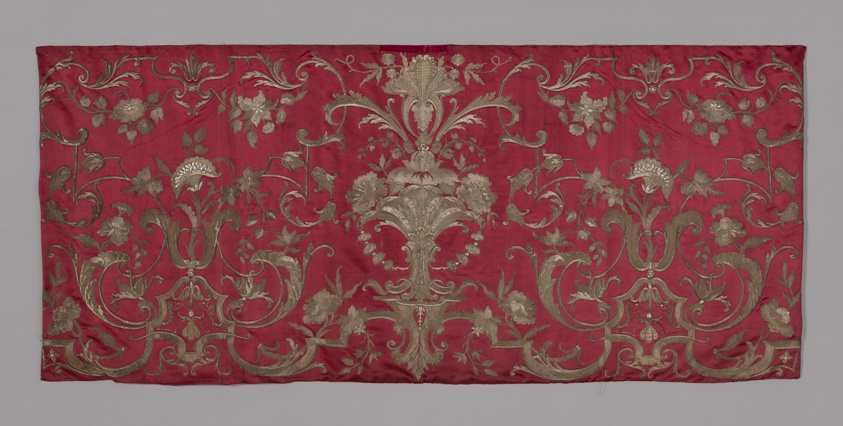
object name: Textile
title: Panel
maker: Germany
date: 19th century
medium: Silk, satin weave; embroidered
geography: Germany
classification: textile; needlework (visual works)